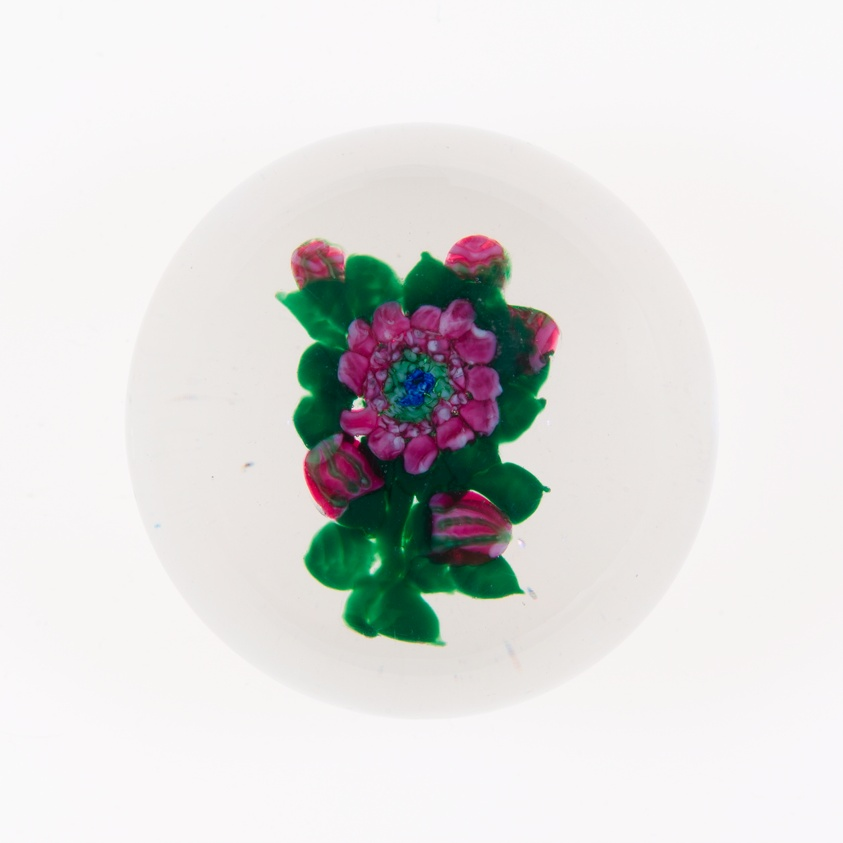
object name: Glass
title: Paperweight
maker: Clichy Glassworks (Cristalleries de Clichy); Clichy, France, 1837-1885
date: 19th century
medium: Glass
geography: France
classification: paperweight; glass